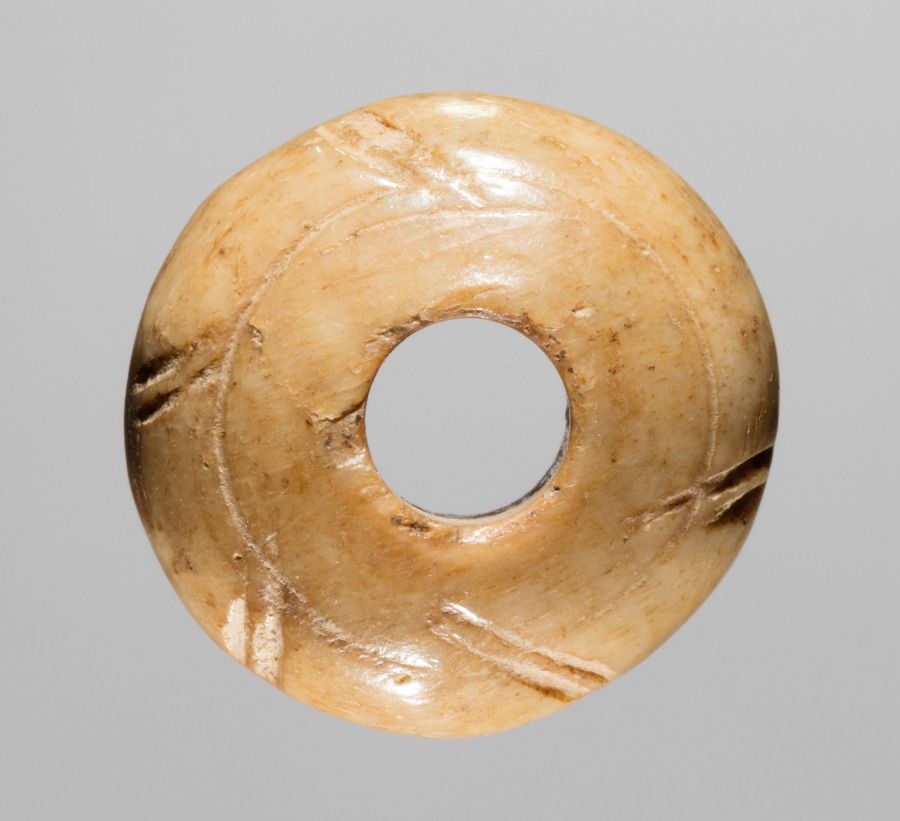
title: Spindle Whorl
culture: Iran, early Islamic period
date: 700s - 900s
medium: bone, incised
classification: Spindle Whorl